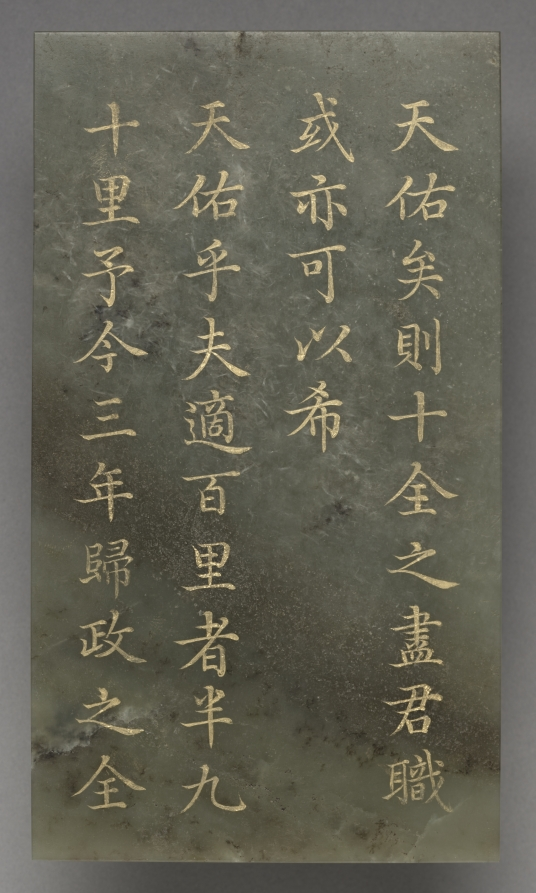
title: Tablet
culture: China, Qing dynasty (1644–1911), Qianlong reign (1736–95)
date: 1778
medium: jade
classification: Jade